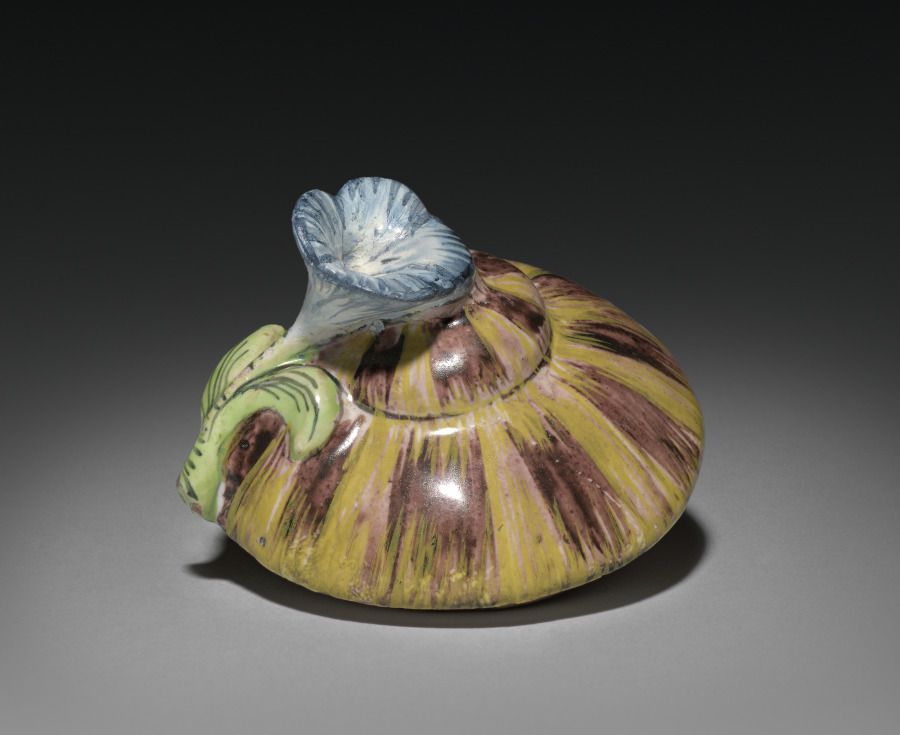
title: Cover for a Box in the Form of a Snail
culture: France, 18th century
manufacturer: Strasbourg Factory (France)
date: c. 1750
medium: faience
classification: Ceramic